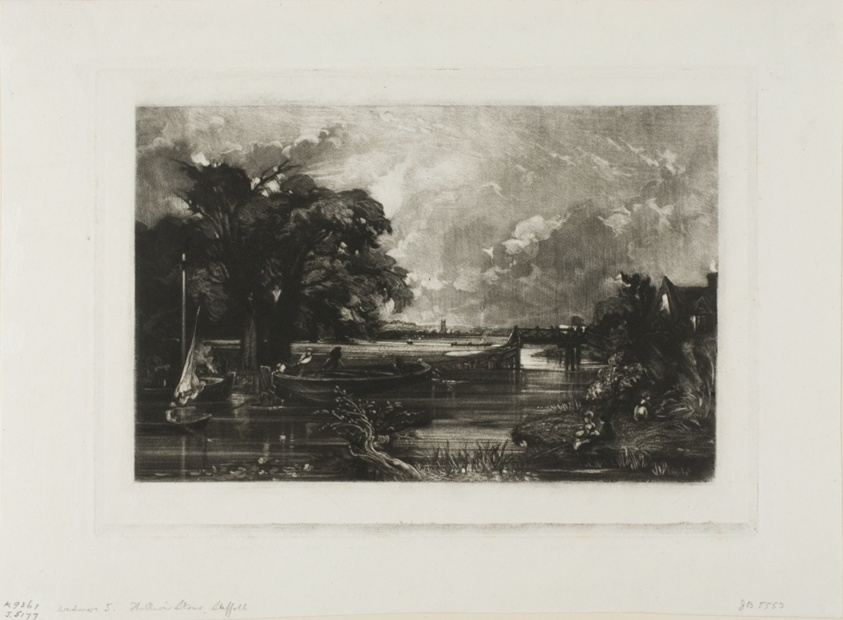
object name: Print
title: River Stour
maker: David Lucas (English, 1802-1881); after John Constable (English, 1776-1837)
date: 1830, published 1831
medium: Mezzotint in black on ivory wove paper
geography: England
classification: mezzotint; print; prints and drawing